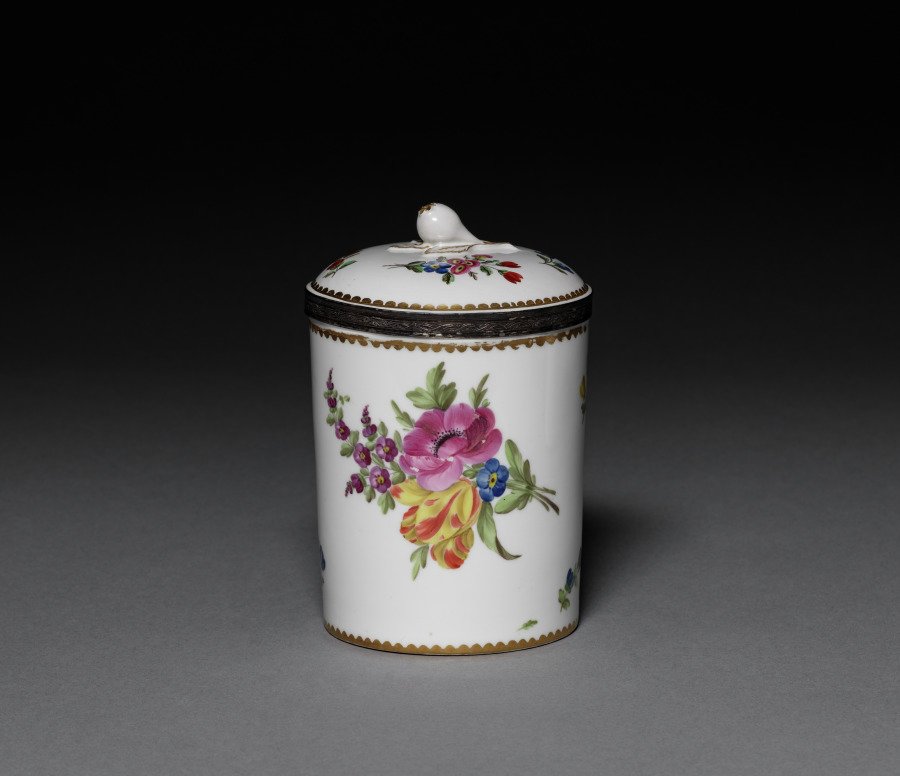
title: Covered Jar (Pot de tabac)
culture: France, 18th century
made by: Faubourg Saint-Denis (French)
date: c. 1779–1789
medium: Hard-paste porcelain with enamel and gilt decoration; metal mount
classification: Ceramic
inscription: [Crowned in brown overglaze enamel]: "CP"